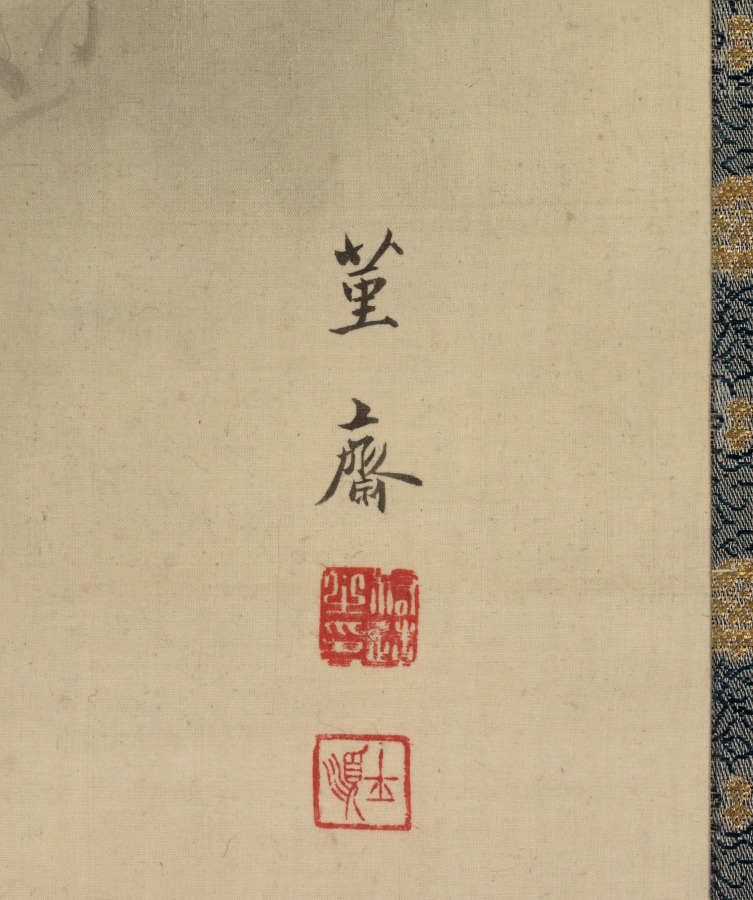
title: Stand-in Fugen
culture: Japan, Edo period (1615–1868)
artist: Kitao Masayoshi (Japanese, 1761–1824)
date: late 1700s–early 1800s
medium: hanging scroll; ink and color on silk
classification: Painting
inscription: artist's signature and two seals, lower right.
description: Here, a woman dressed as a man replaces Fugen, a bodhisattva—a being among those considered enlightened in Buddhism—who symbolizes learning as a path to awakening and typically rides an elephant. The painting teaches the lesson of impermanence through the petals falling from the lotus flower the woman holds. It also alludes to the legend of Eguchi, a 12th-century courtesan who, following an encounter with a Buddhist monk-poet called Saigyō, revealed herself to be a manifestation of Fugen.